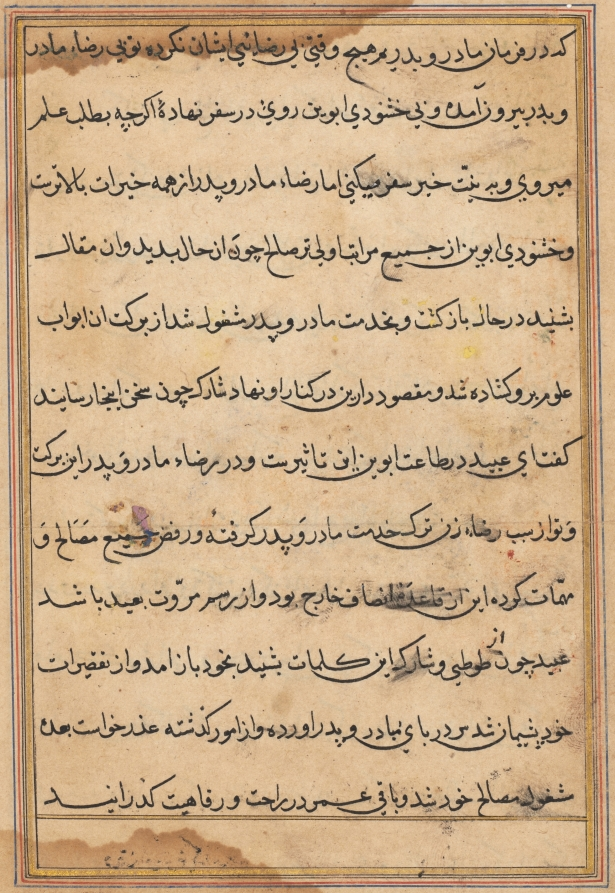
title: Page from Tales of a Parrot (Tuti-nama): text page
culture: Mughal India, court of Akbar (reigned 1556–1605)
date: c. 1560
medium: gum tempera, ink, and gold on paper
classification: Painting